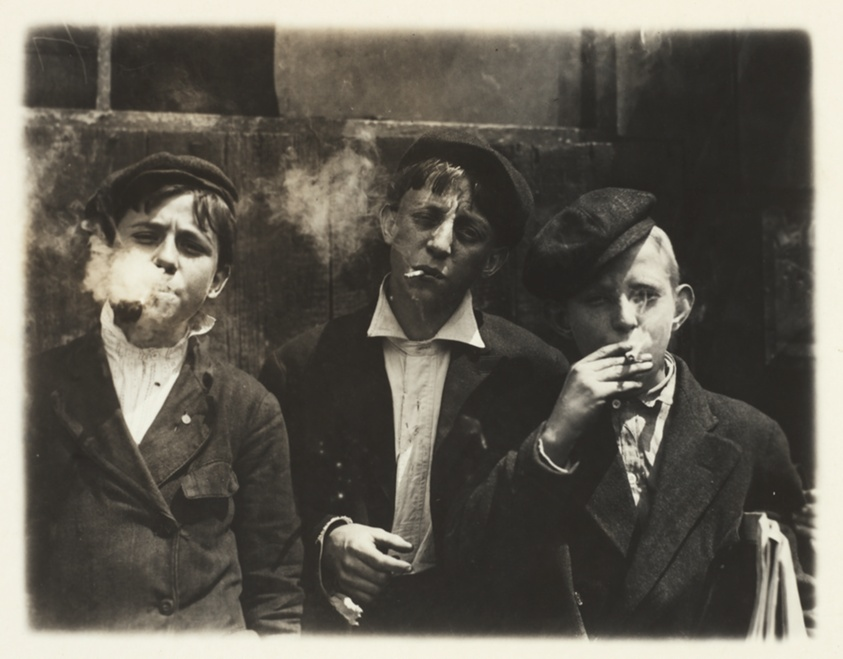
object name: Photograph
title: Newsies at Skeeter Branch, St. Louis, Missouri, 11:00 a.m.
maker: Lewis Wickes Hine (American, 1874–1940)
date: May 9, 1910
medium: Gelatin silver print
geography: United States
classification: gelatin silver (developing-out-paper) pr; photographic process; photography; photograph